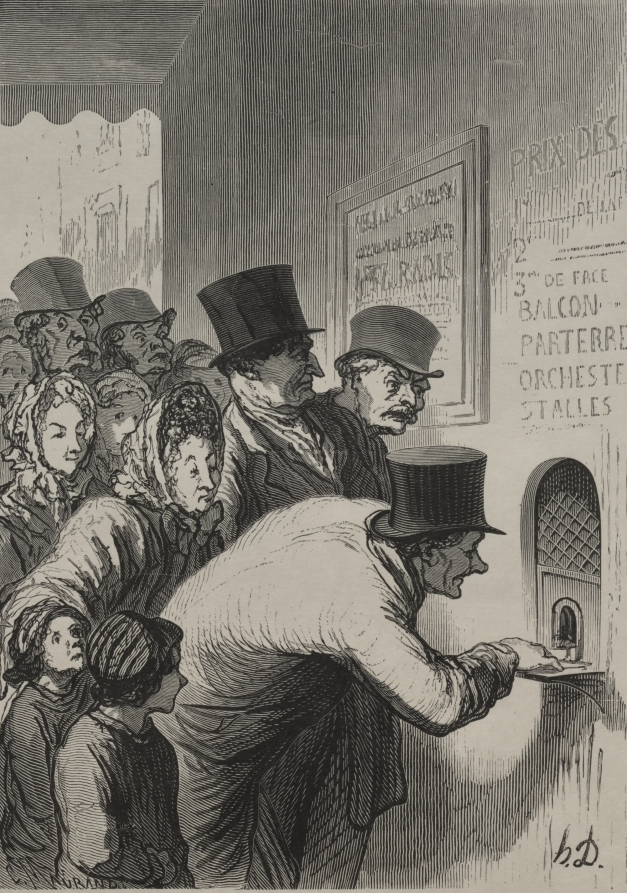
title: The Box Office at the Theater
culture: France, 19th century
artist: Honoré Daumier (French, 1808–1879)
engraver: Charles Maurand (French, 1824–1904)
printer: François Louis Schmied (Swiss, 1873–1941)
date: 1862, printed 1920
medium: wood engraving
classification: Print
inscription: Lower margin, in pencil: 65/75 ; red stamp: FLS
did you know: This image was used in a stamp issued in 2008 by the French Post to celebrate the 200th anniversary of Daumier's birth.